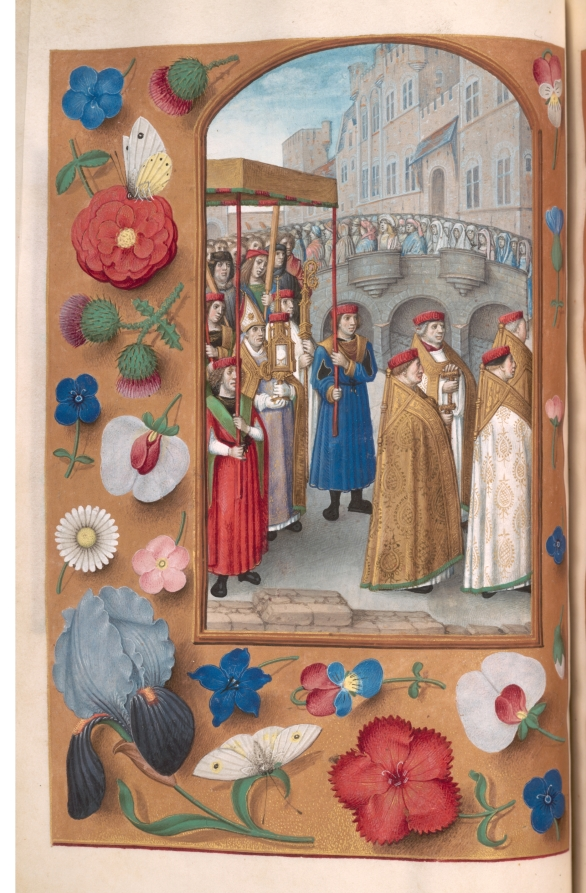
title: Hours of Queen Isabella the Catholic, Queen of Spain: Fol. 43v, Procession of the Sacrament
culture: Flanders, Ghent and Bruges, late 15th century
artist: Master of the First Prayerbook of Maximillian (Flemish, c. 1444–1519)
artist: and Associates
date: c. 1500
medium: ink, tempera, and gold on vellum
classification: Bound Volume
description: This manuscript was illuminated by a circle of at least five highly organized manuscript painters active in the Flemish cities of Ghent and Bruges. The principal illuminator was Alexander Bening, who painted the majority of the book's miniatures. Manuscripts produced by this circle of artists are renowned for the decoration of their borders, which typically feature a rich variety of realistically-painted flowers, birds, and butterflies. This prayer book, called a book of hours, was intended not for a cleric, but for the private devotions of a lay person-in this case, Isabella the Catholic, Queen of Spain (1451-1504). Isabella's coat of arms embellishes the book's frontispiece. It is unlikely that the book was commissioned by the Queen herself; rather, she probably received it as a diplomatic gift from someone courting her patronage, perhaps Cardinal Francisco Jimenez de Cisneros. A Franciscan friar, Jimenez was dependent upon Isabella for his advancement, first to the post of Queen's confessor in 1492, and then to Archbishop of Toledo in 1495.